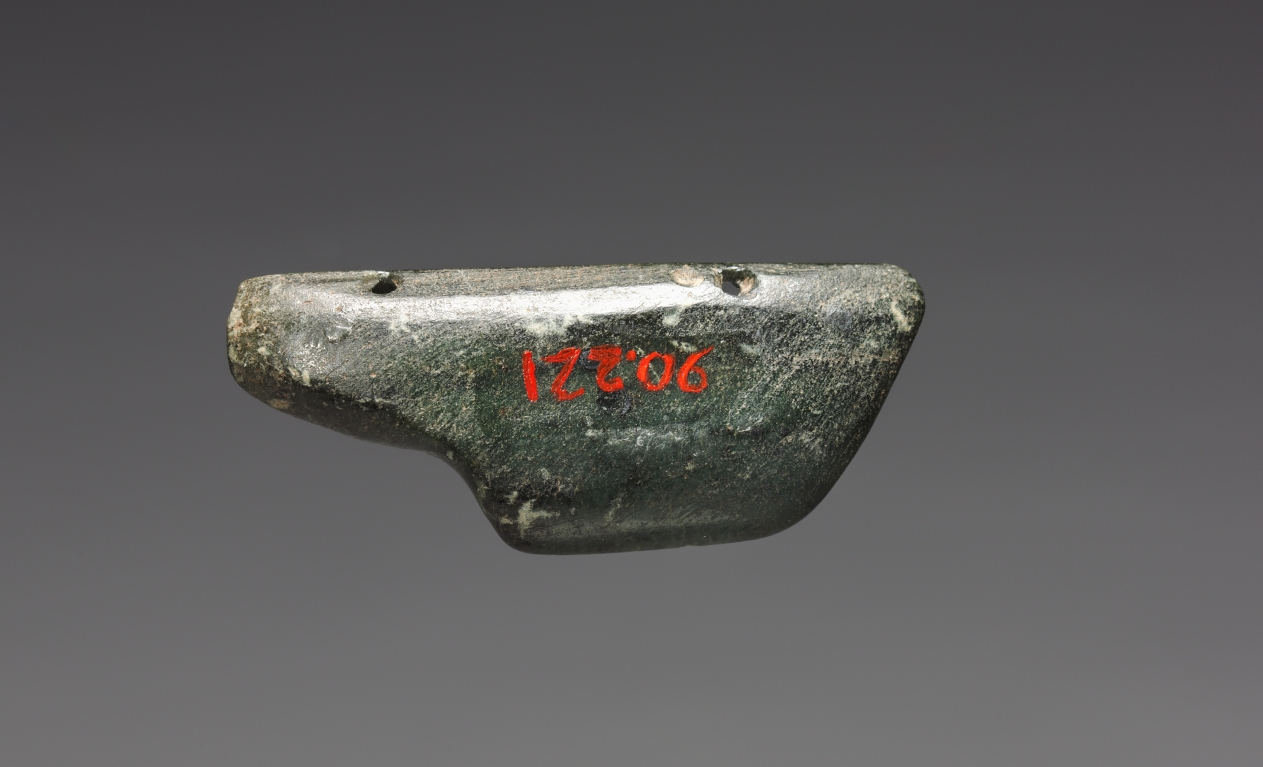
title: Mask Attachment(?)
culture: Mesoamerica, Mexico, Olmec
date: 900–300 BCE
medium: serpentine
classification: Sculpture